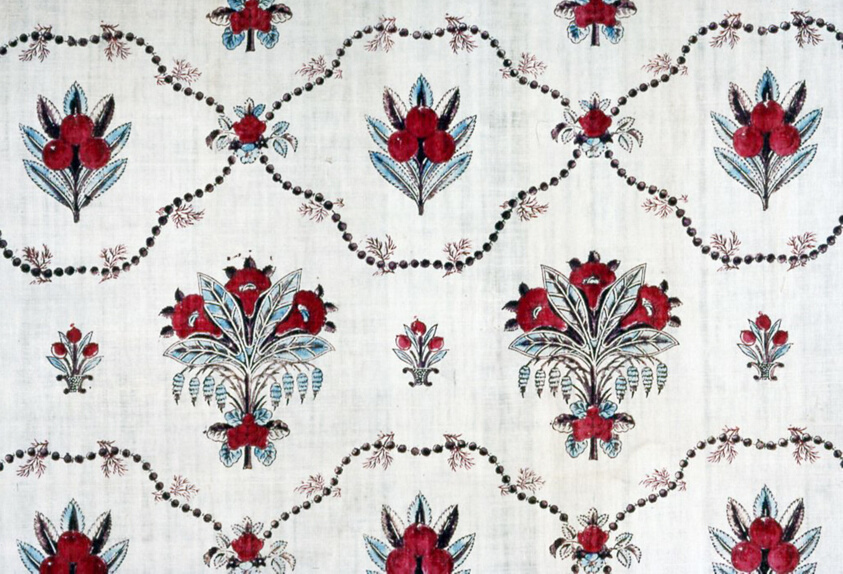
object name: Textile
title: Fragment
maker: France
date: 18th century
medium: Cotton, plain weave; block printed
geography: France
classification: textile; weaving - printed; weaving